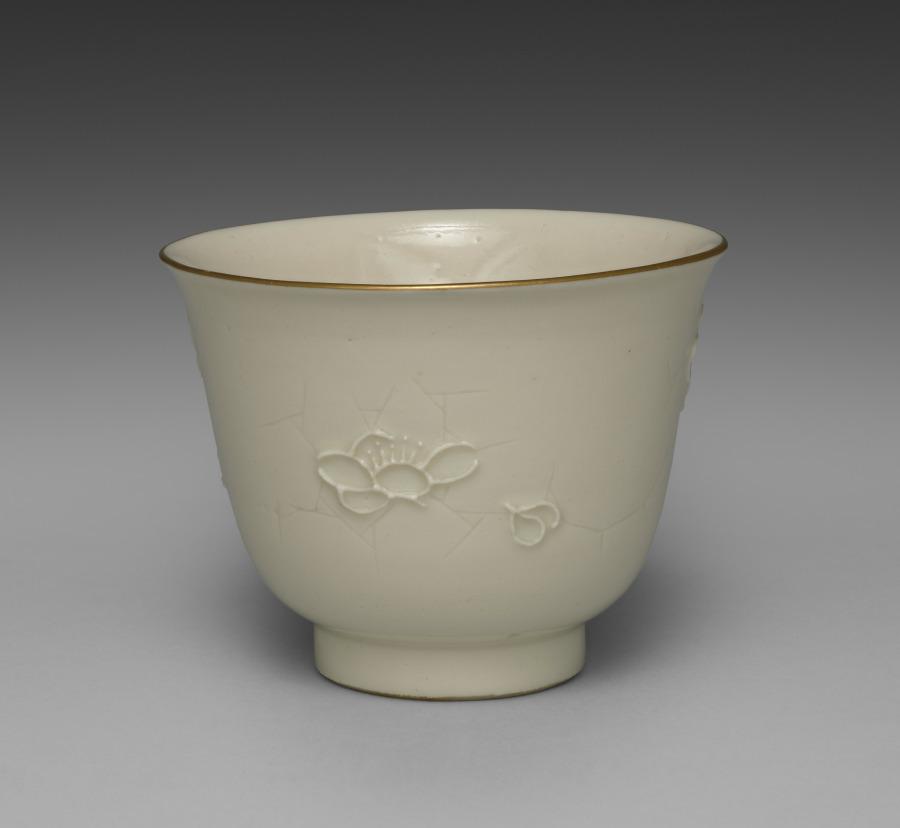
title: Drinking Cup from Dining Set with Plum Blossoms and Cracked-Ice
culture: Japan, Meiji period (1868–1912)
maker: Seifū Yohei II (Japanese, 1844–1878)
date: c. 1875–78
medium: Porcelain with molded designs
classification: Ceramic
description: Each item in this set has a delicate low-relief design of flowering plum branches over scattered, intersecting lines meant to resemble the cracked-ice surface of a frozen body of water and is signed on the base in gold pigment. While Yohei II produced many fine works in underglaze blue, like those produced by Kiyomizu Shichibei, he also made works in quite different styles later in his career, from the early 1870 s. In 1873, he was appointed purveyor to the Industrial Center of Kyoto Prefecture, a designation associated with Kyoto’s efforts to reach an international market through the port of Kobe; and from 1875 until his death, he was involved in national-level projects to present Japanese ceramics across the world. It was during this period that Yohei III was apprenticed to Yohei II, and it has been suggested that this set may in fact be an early example of Yohei III’s work, which he signed with his teacher’s name. Decorated with flowers resembling Japanese textile motifs, the set calls to mind the design of Yohei II’s pair of vases with plum blossoms in the Victoria and Albert Museum. Here, the elaborate trees created for a formal public exhibition setting have been translated into the approachable blossoms of the genteel domestic environment. While the designs are consistent across the pieces, each raised flower petal and pistil and each incised line in the ice was done by hand, so the cups, bowls, and dishes are similar yet unique. The bottoms of two boxes once identified the set’s owner, but the information has been deliberately obscured with black ink. However, inscriptions still visible appear to indicate two occasions, once at the end of July 1886 , and once again in June 1916 , when parts of the set were requested from Hokura in Niigata Prefecture. The location corresponds to a neighborhood in the present-day city of Jōetsu. The surname Tsuji 辻 also appears on a paper tag affixed to one of the box cloths. Future research may possibly reveal more about their provenance. A vase by Yohei III in a private collection combines the formal grandeur of the Yohei II vases in the Victoria and Albert Museum with the gentler design of this dining set, placing flowering plum trees against soft, scalloped-edge clouds resembling those in golden screens.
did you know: The dining wares have a creamy white coloration that the four boxes containing them identify as Korean in style.